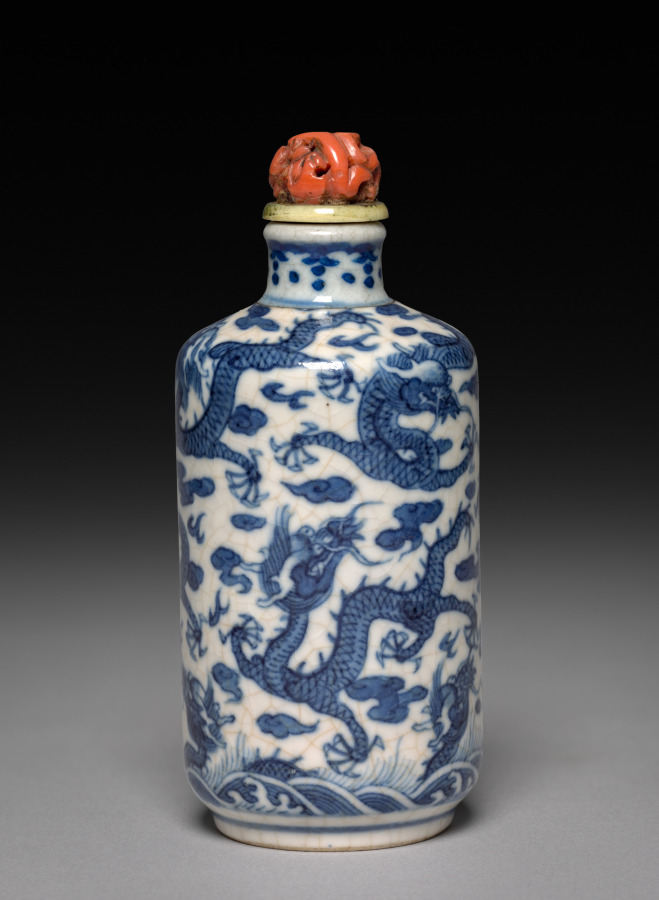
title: Snuff Bottle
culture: China, Qing dynasty (1644-1911), Kangxi reign (1662-1722)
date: 1662–1722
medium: porcelain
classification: Ceramic